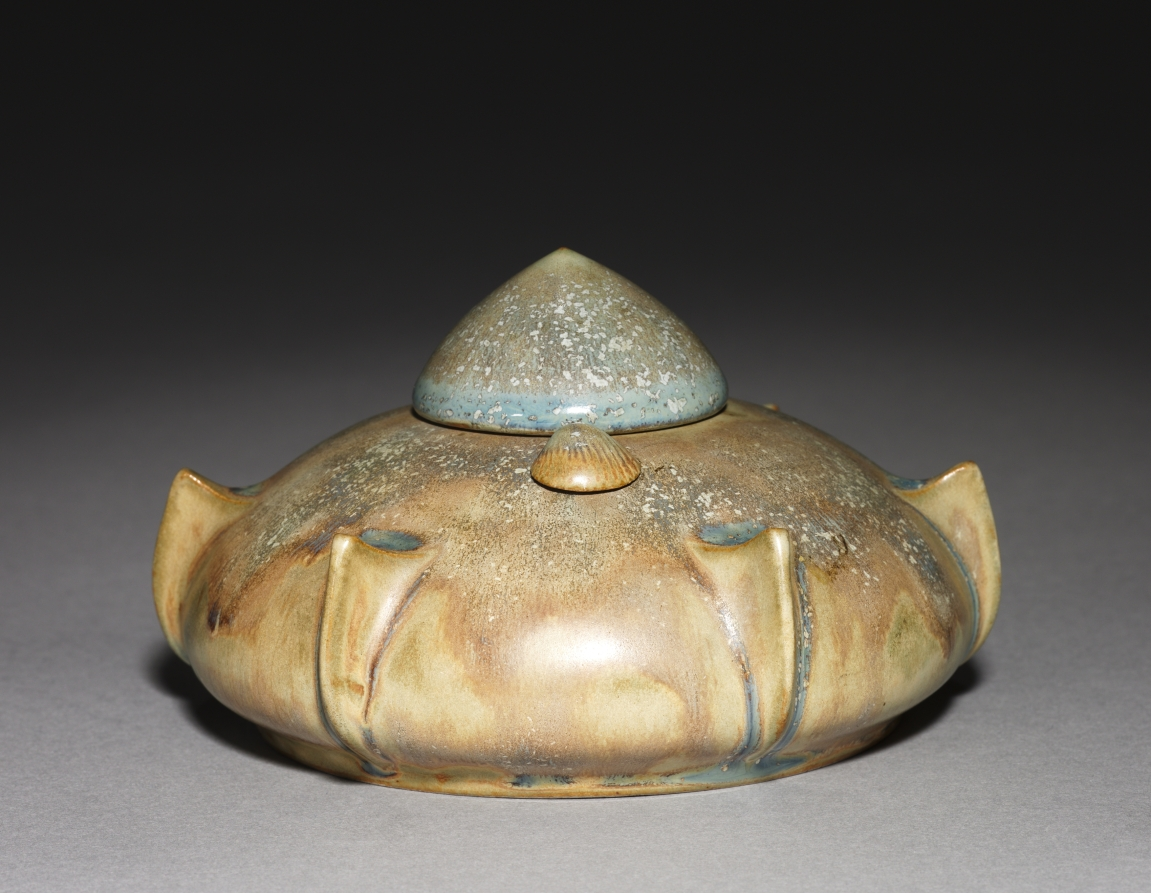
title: Inkwell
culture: France, Sèvres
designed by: Alexandre Sandier (French, 1843–1916)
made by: Sèvres Porcelain Factory (French, est. 1756)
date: 1903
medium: stoneware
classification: Ceramic